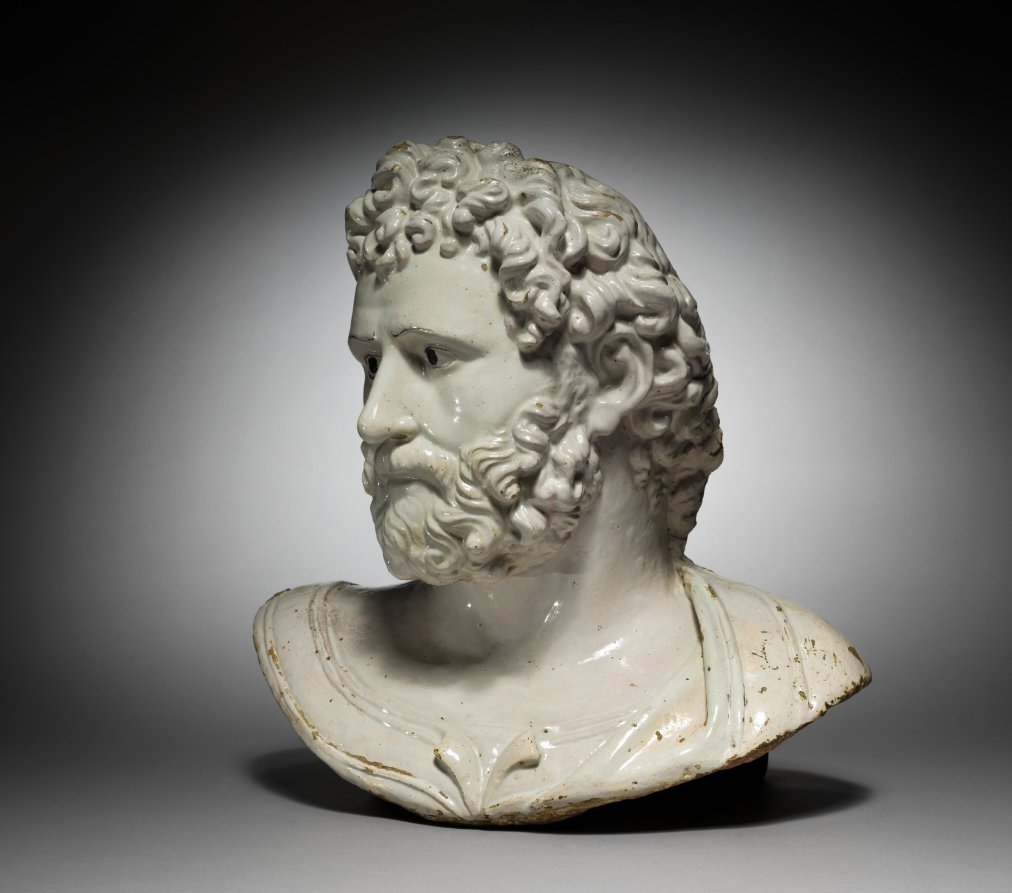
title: Bust of a Classical Hero or Emperor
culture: Italy, 16th century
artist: Girolamo della Robbia (Italian, 1488–1566)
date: early to mid 16th century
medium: glazed terracotta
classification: Sculpture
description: This bust most likely represents an emperor or condottiere from classical antiquity, and probably formed part of a series of classical heads. Such groups of worthies were featured as decorative schemes in the studioli and architectural projects of Renaissance statesmen. Attesting to the sophistication of their learned patrons, these busts also provided the opportunity for artists to explore the contemporary stylistic relevance of classical portraiture—a source of fascination and inspiration for Florentine sculptors of this period.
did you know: Head-and-shoulders portraits, known as busts, were popular from Roman times.